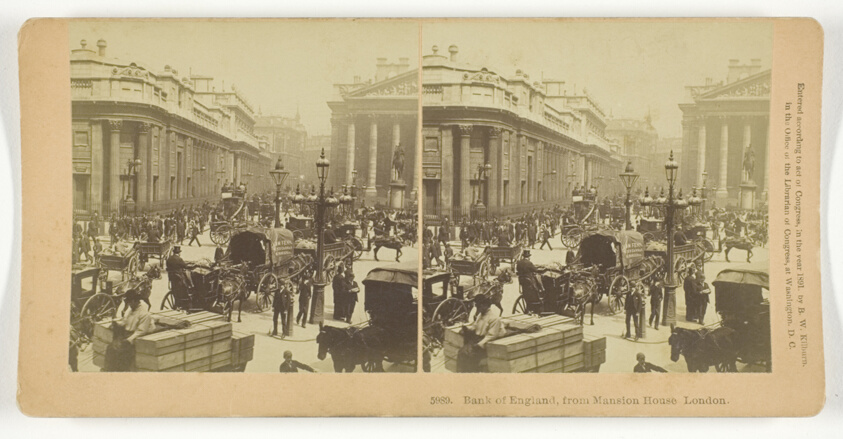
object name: Photograph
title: Bank of England, from Mansion House, London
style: 19th century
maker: B. W. Kilburn; American, 1827–1909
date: 1891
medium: Albumen silver print, stereo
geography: United States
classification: stereograph (albumen); albumen silver print; photographic process; photography; photograph